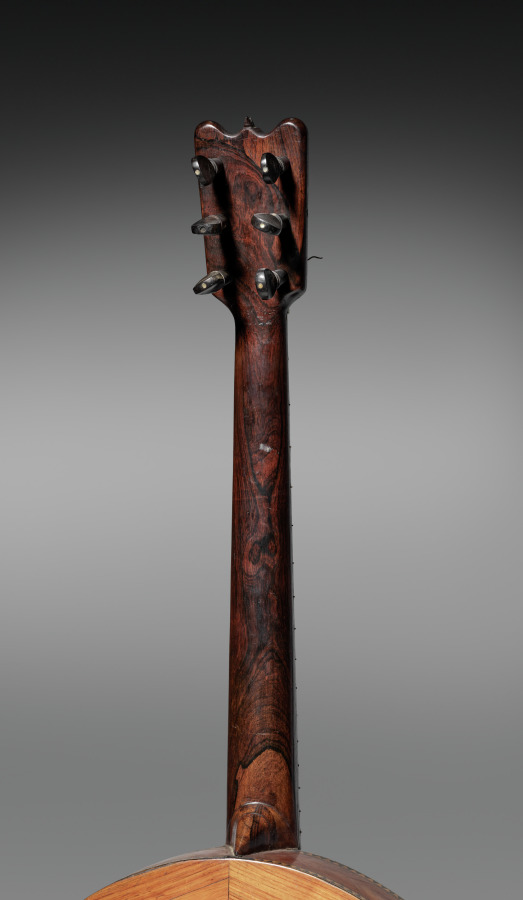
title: Guitar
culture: Italy, 19th century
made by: probably by Fernando Theze (Italian)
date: c. 1860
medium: wood, ebonized wood, mother of pearl inlay, resin, bone?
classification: Musical Instrument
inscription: label inside reads: "Faite a Turin par F. Theze--Amateur."